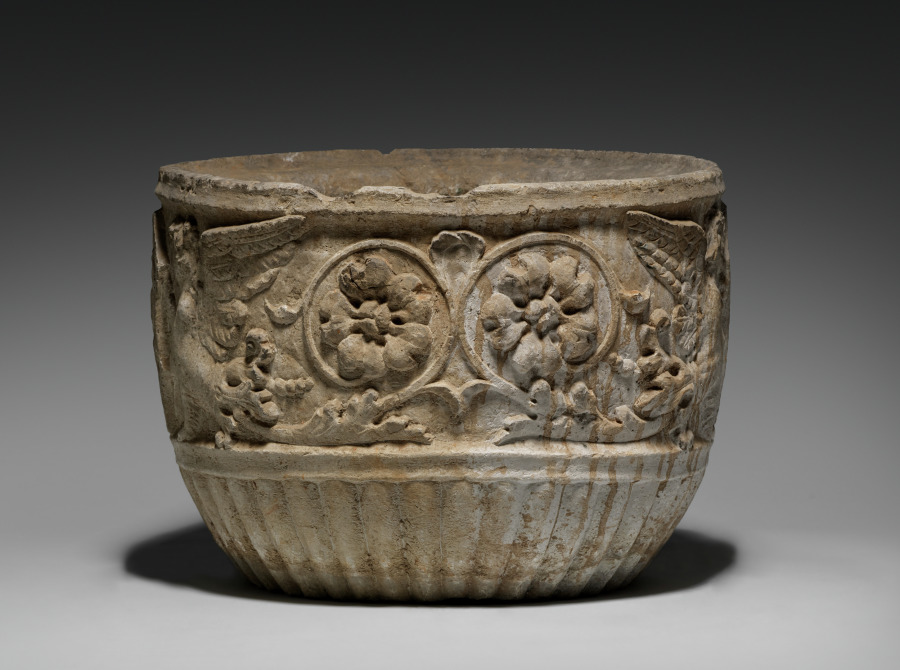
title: Garden Pot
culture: Italy, 19th century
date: 19th Century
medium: stone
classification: Miscellaneous